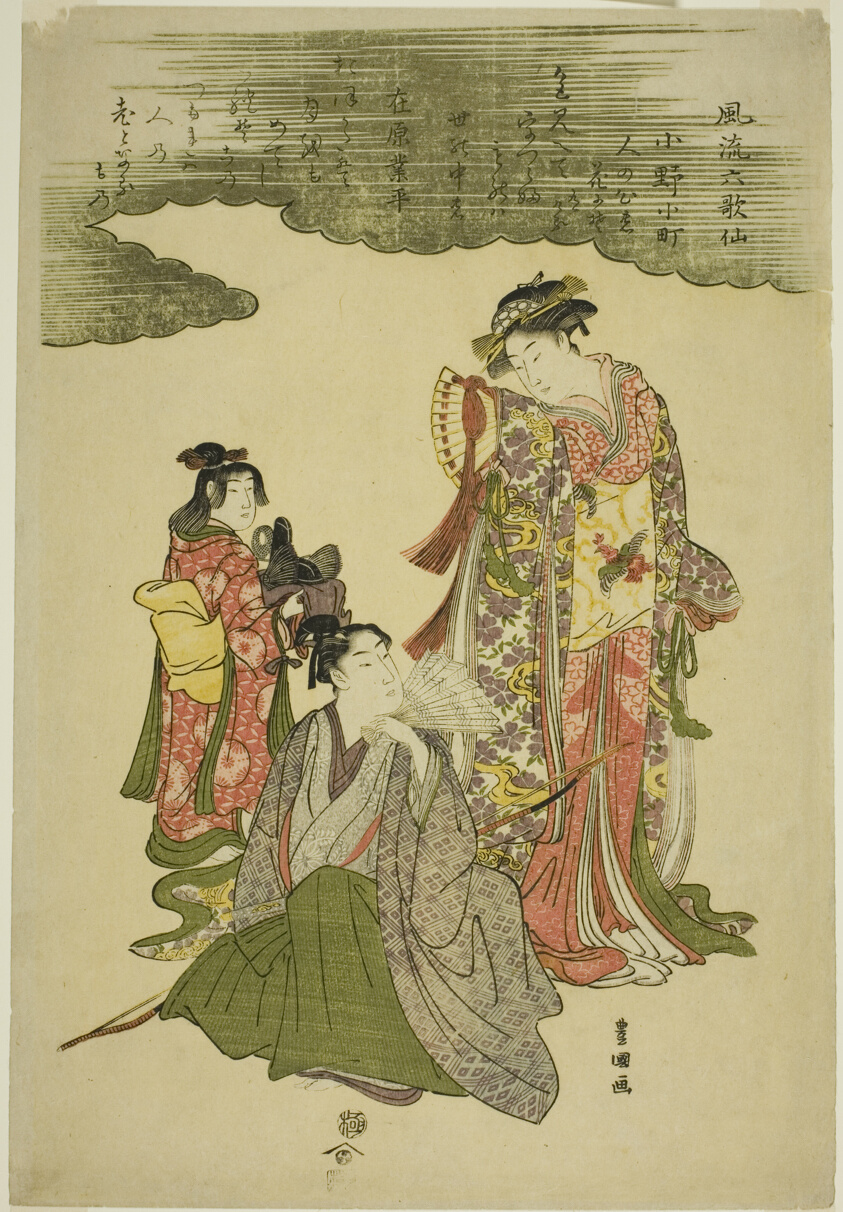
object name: Print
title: Fashionable Six Immortal Poets (Furyu rokkasen)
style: Japanese (culture or style)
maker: Utagawa Toyokuni I 初代 歌川 豊国; Japanese, 1769–1825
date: c. 1793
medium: Color woodblock print; center sheet of oban triptych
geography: Japan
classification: woodblock print; print; asian art